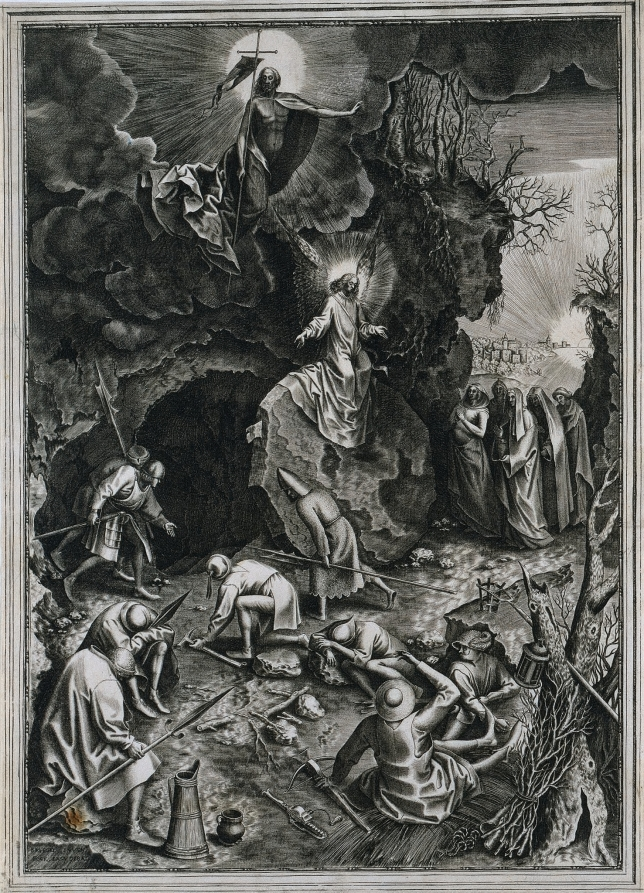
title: The Resurrection of Christ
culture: Netherlands, 16th century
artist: Philip Galle (Flemish, 1537–1612)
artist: after Pieter Bruegel (Netherlandish, c. 1525/30–1569)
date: c. 1562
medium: engraving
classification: Print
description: After Christ's crucifixion and burial, he rose from his tomb to dwell on earth for 40 days before ascending to heaven. According to the Gospel account of Matthew, as depicted here, the soldiers guarding the tomb fell asleep and the tomb opened miraculously. Christ appears above, triumphant. For Christians, the resurrection of Christ is essential for the doctrine of salvation and the hope of deliverance from the power and effect of sin. The promise of salvation, of a new day, is symbolized by the rising sun, to which Christ points, and Christ's halo, which resembles a sun. Galle's engraving is based on a monochrome wash drawing by Bruegel. The print, which is the same size as the drawing, but with the image reversed, even retains the frame.